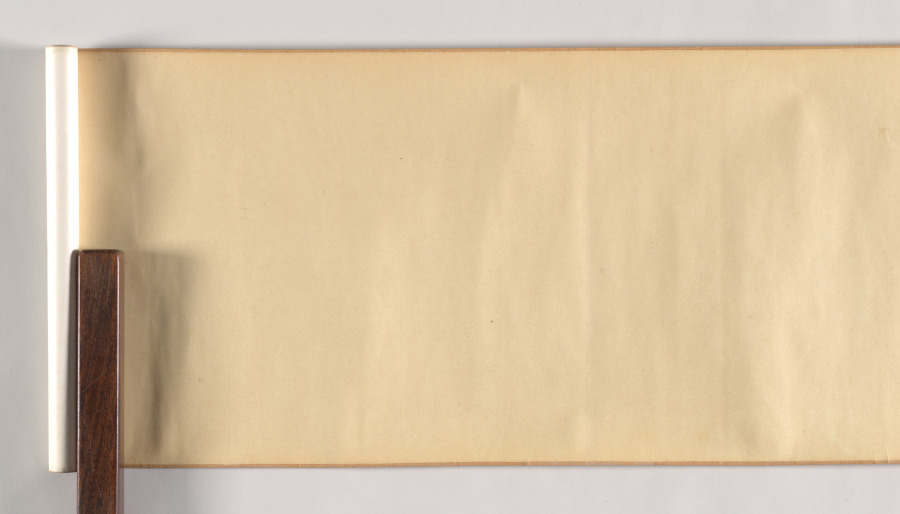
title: Three Horses and Four Grooms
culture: China, Yuan dynasty (1271-1368)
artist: Ren Renfa (Chinese, 1254–1328)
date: c. 1320s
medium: handscroll, ink and color on silk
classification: Painting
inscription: 月山道人. [印] 任氏子明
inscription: 1 colophon and 16 additional seals: 1 poem, 1 colophon dated 1552 or 1612, and 3 seals of Wang Yiying 王一瀛 (1500s); 2 seals of Liang Qingbiao 梁清標 (1620-1691); 6 seals of the Qianlong 乾隆 Emperor (r. 1736-95); 3 seals of the Jiaqing 嘉慶 Emperor (r. 1796-1821); 1 seal of the Xuantong 宣統 Emperor (r. 1908-12); 1 seal of Yu Xiezhong 余協中 (1900s).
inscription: Poem and colophon by Wang Yiying 王一瀛 (1500s): As for painters of horses in the previous dynasty, Surely the name of Yueshan [Ren Renfa] must come first. Under his brush and on his silk, They seem to have just galloped out from the imperial stud. Now as the world overflows with inferiority, Who, from the stable, can recognize a dragon-horse amidst mediocrity. Ren Yueshan [Ren Renfa] of the Yuan Dynasty was best in horse paintings. The three fine steeds he painted in this scroll are so dashing, so vigorous in spirit that they have indeed grasped some of the "brush-idea" of Han Gan. Not long ago this painting came into the possession of Mr. Gui Shanquan, who asked for my inscription. And I, while reading the old manuscripts of Hengshan [Wen Zhengming, 1470-1559], by accident, came cross the poem quoted above. As the ancients said "in painting horses, Master Han was [inspired by and produced] real horses; in composing poems, Master Su [Su Dongpo, the leading Song poet] wrote as if a painting were before him." These are truly what should be considered the two excellences; indeed, they are to be treasured. In the sixth month of the renzi year [either 1552 or 1612]. Jian feng shan ren [The Mountain Dweller of the Sword Peak], Wang Yiying, written in the Qu si ting Pavilion at Chiyang.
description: Ren Renfa's horse images are elegant in appearance and vigorous in spirit. His work attracted not only Chinese scholars but also the Mongols at the imperial court. Inspired by the contemporary scholarly interest in restoring a sense of antiquity in art—an artistic direction led by Zhao Mengfu that exerted a great impact in the Yuan art scene—Ren Renfa, like Zhao Mengfu, modeled his depictions of horses after the Song master Li Gonglin. Another key style component that Ren introduced to this genre was a revival of the Tang classical tradition. The refined color treatment of the horses as seen here was derived from the Tang master Han Gan.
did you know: Only the elegant first horse with a white blaze is accompanied by two grooms, as if its lightning speed required extra supervision.